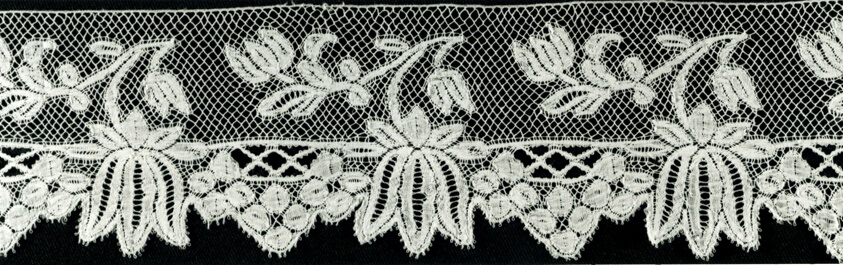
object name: Textile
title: Four Borders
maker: Belgium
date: 1865/85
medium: Cotton, bobbin straight lace of a type known as "Valenciennes" with a square Valenciennes mesh ground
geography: Belgium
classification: textile; lace - bobbin